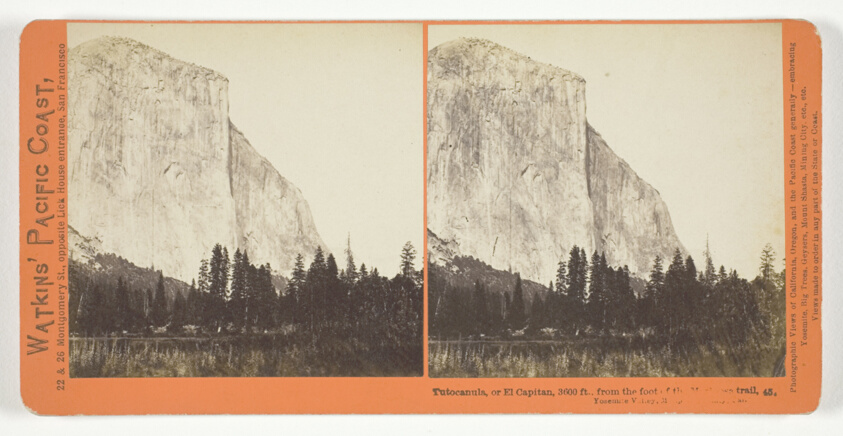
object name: Photograph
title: Tutocanula, or El Capitan, 3600 ft., from the foot of the Mariposa Trail, Yosemite Valley, Mariposa County, Cal., No. 45 from the series "Watkins' Pacific Coast"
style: 19th century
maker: Carleton E. Watkins; American, 1829-1916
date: 1861/76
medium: Albumen print, stereo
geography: United States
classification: stereograph (albumen); albumen silver print; photographic process; photography; photograph